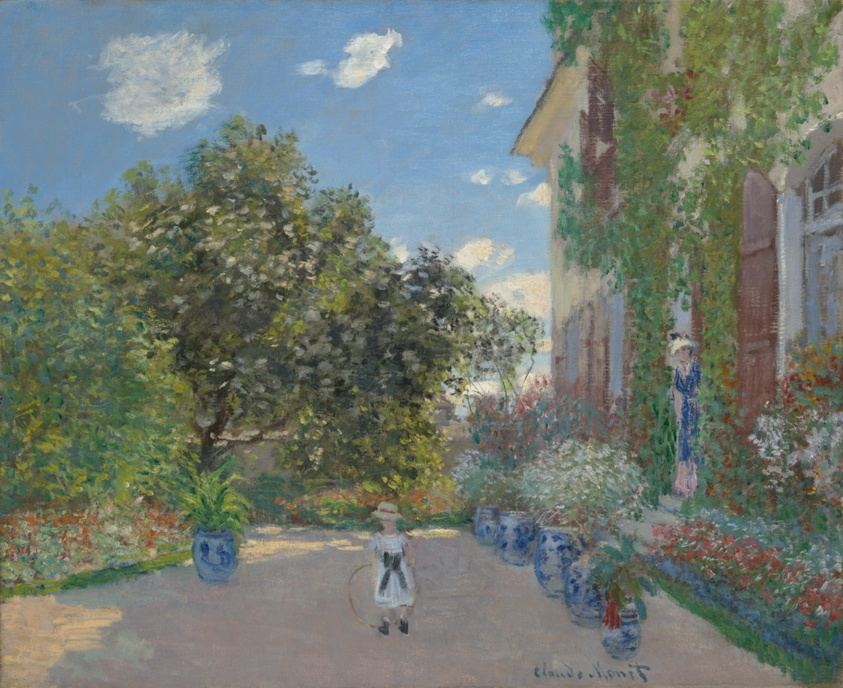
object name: Painting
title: The Artist's House at Argenteuil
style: Impressionism, nineteenth century, 19th century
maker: Claude Monet (French, 1840–1926)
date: 1873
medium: Oil on canvas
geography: France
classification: oil on canvas; paint; oil paintings (visual works); french; painting; european painting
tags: landscapes, garden, girl, woman, trees, flowers, house, homes, France, toys, toy, foliage, bushes, children, weather/seasons, leisure, domestic scenes, families, Century of Progress, world's fairs, Chicago World's Fairs